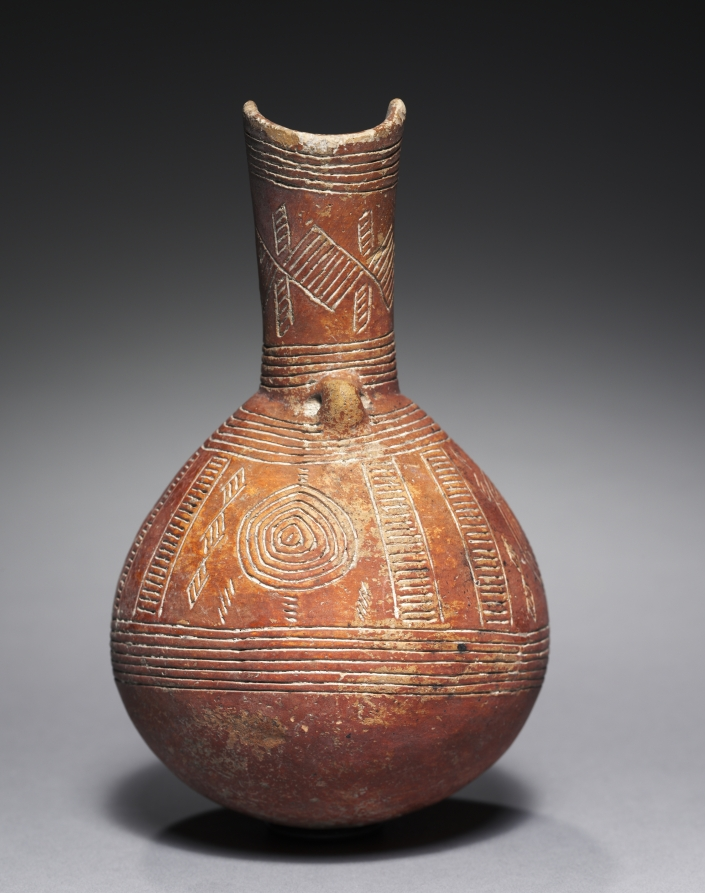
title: Jug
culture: Cyprus, Alambra or Ayia Paraskeve, early Cypriot III-middle Cypriot I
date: c. 2000–1800 BCE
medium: red ware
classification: Ceramic